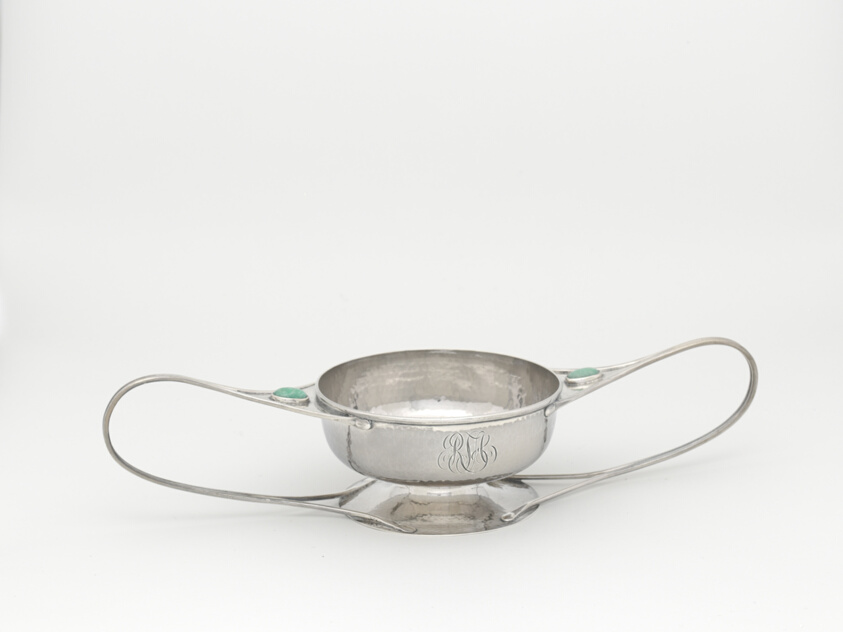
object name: Metalwork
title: Two-Handled Dish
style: Arts and Crafts Movement, American Arts and Crafts Movement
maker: Shreve, Crump and Low (American, founded 1869); Boston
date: 1902–7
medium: Silver and turquoise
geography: Boston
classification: dish (vessel); silver; american decorative arts; american arts; decorative arts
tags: dining, drinking